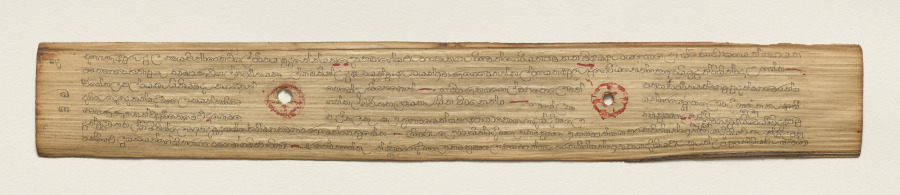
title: Leaf from a Buddhist Manuscript (recto)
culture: Sri Lanka, Singhalese, Late 17th century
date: c. 1700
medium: fiber paper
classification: Manuscript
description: Palm leaf material is still used for manuscripts in Sri Lanka. The palm leaves are prepared first by boiling them, drying them in the sun, and then rubbing them with oils. Scribes then use a metal stylus to incise the text. Then charcoal powder is wiped across the pages, filling in only the inscribed lines.